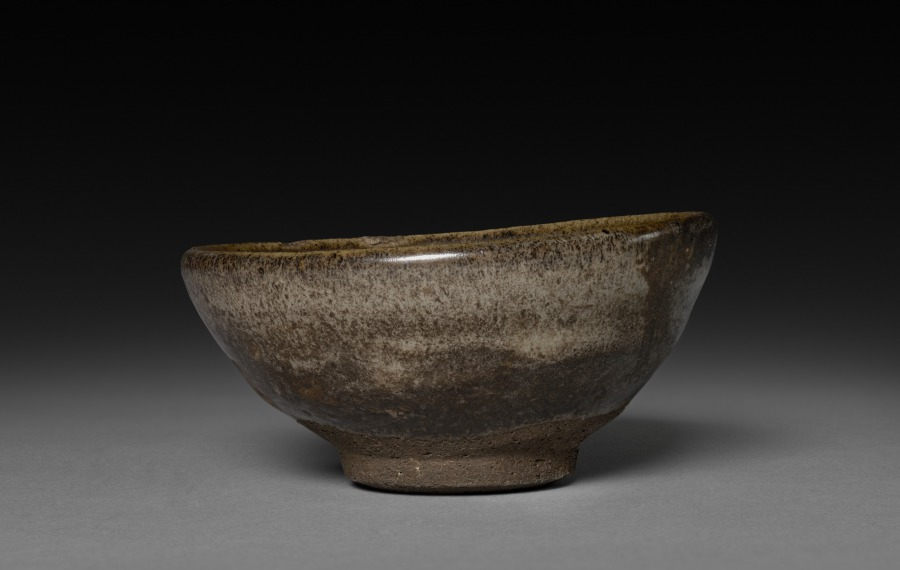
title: Tea Bowl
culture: China, Fujian province, Song dynasty (960-1279)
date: 960–1279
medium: stoneware, Jian ware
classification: Ceramic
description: This brownish-black stoneware tea bowl has rounded sides. Its mottled and blurred green-gray and brown glaze stop short of the foot.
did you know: Jian ware was very popular with the tea cultures in China and Japan.